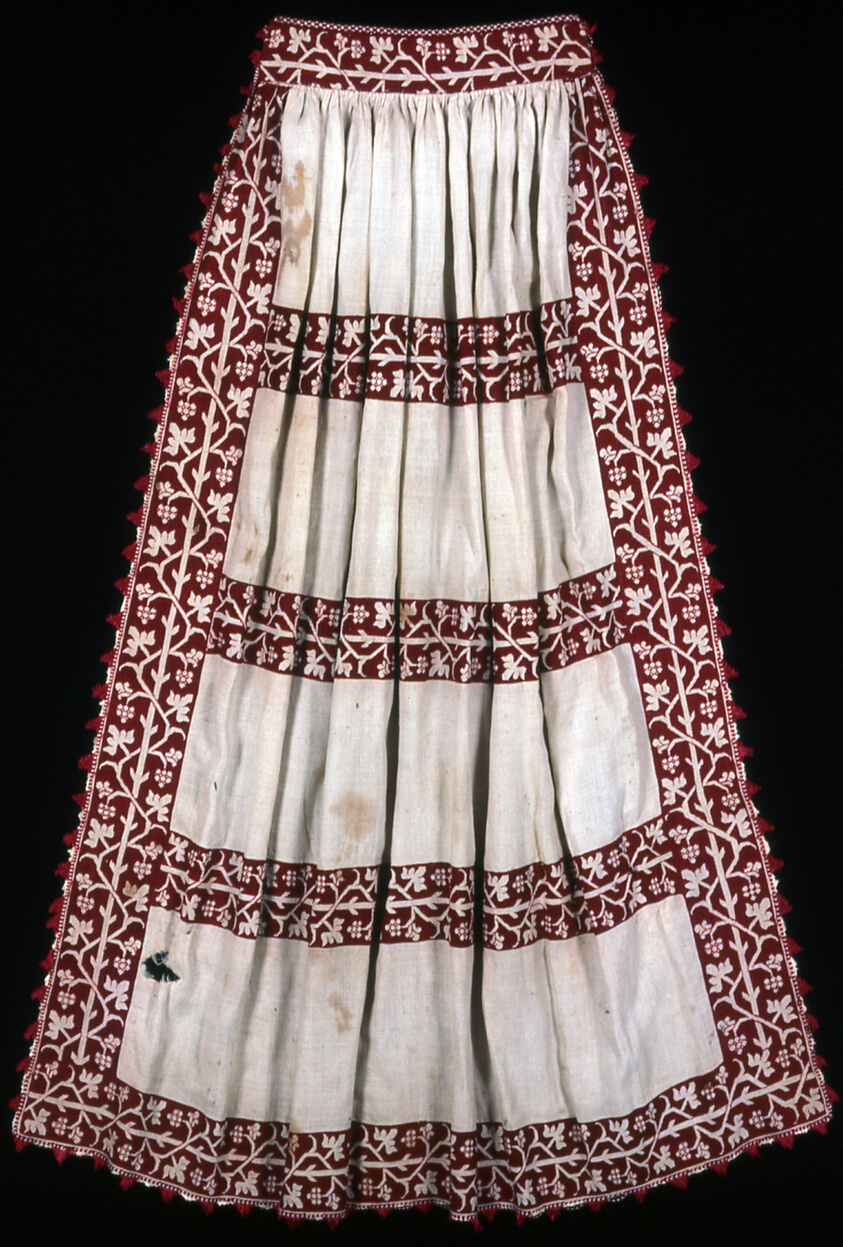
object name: Textile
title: Apron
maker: Italy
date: 17th century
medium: Linen, plain weave; pulled thread work with silk floss in two-sided Italian cross stitch; inside waistband gathered by feather, running, and back filling stitches; edged in silk, warp twining with ground weft fringe, attached by buttonhole and detached buttonhole stitches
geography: Italy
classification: textile; costume; needlework (visual works)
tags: fashion